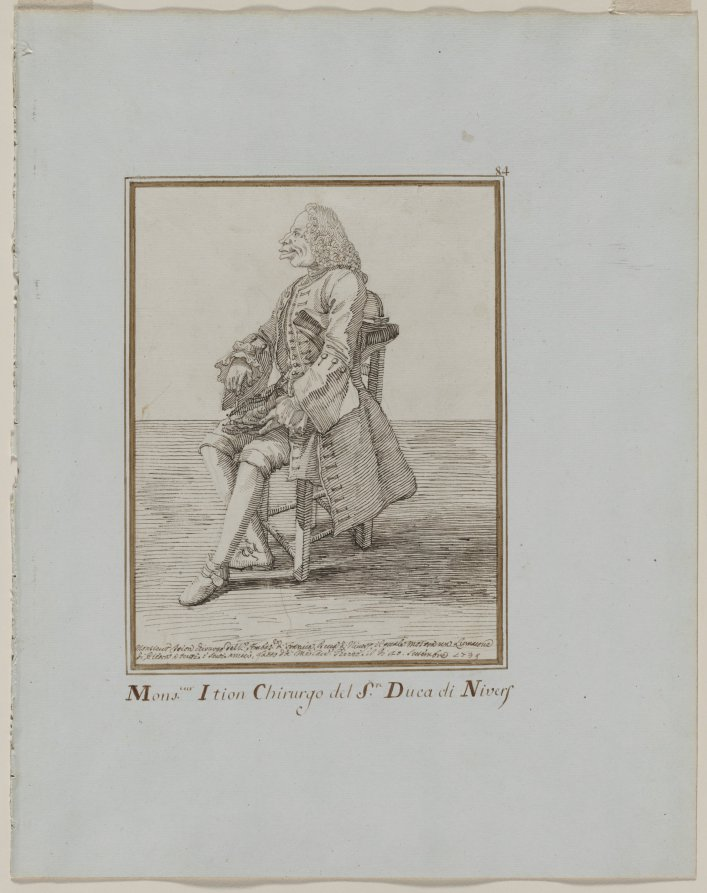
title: Monsieur Ition Chirurgo del sre. Duca di Nivers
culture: Italy, 18th century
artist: Pier Leone Ghezzi (Italian, 1674–1755)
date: 1749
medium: pen and brown ink over graphite; framing lines in brown ink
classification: Drawing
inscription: signed, across bottom, in brown ink: Monsieur Ition chirurgo dello [o in superscript] Ambas.e [e in superscript] di Federico; Duca di Niverf il quale mostre un Lumacone / di [illegible] à [illegible] i suoi amici, fatto da mè Cav. Ghezzi il di 10 Settembre 1749 ; SECONDARY SUPPORT, upper right, in brown ink: 84 ; across bottom, in brown ink: Mons.eur [eur in superscript] Ition Chirurgo del S.re [re in superscript] Duca di Nivers